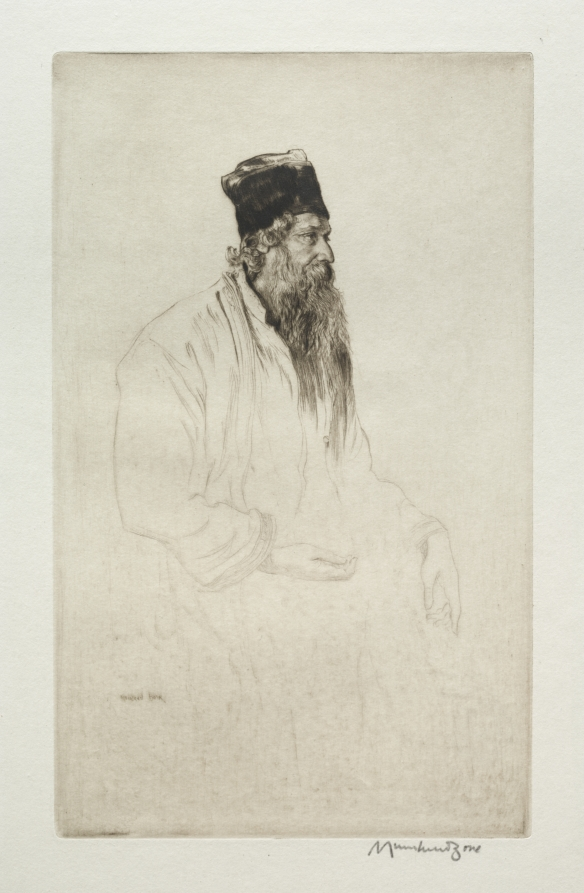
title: Rabindranath Tagore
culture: England, 20th century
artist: Muirhead Bone (British, 1876–1953)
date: 1920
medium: drypoint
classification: Print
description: Poet laureate and first Asian recipient of the Nobel Prize in literature, Tagore (1861–1941) was a leader of the nonviolent movement to free India from British rule. The artist has rendered Tagore’s face with penetrating realism and luxurious textures. In contrast, his body is left as a sketch, giving him an ethereal quality; his hand positions are evocative of the mudras, or symbolic gestures, of Indian holy men or divinities. This portrait was probably made during Tagore’s 1920 visit to London from India to seek support for his new university in Bengal. For Tagore, however, the trip was overshadowed by his observation of British indifference to the 1919 massacre of hundreds of unarmed Indians in the Punjab by colonial forces. Tagore relinquished his knighthood and redoubled his efforts to lead India to independence.